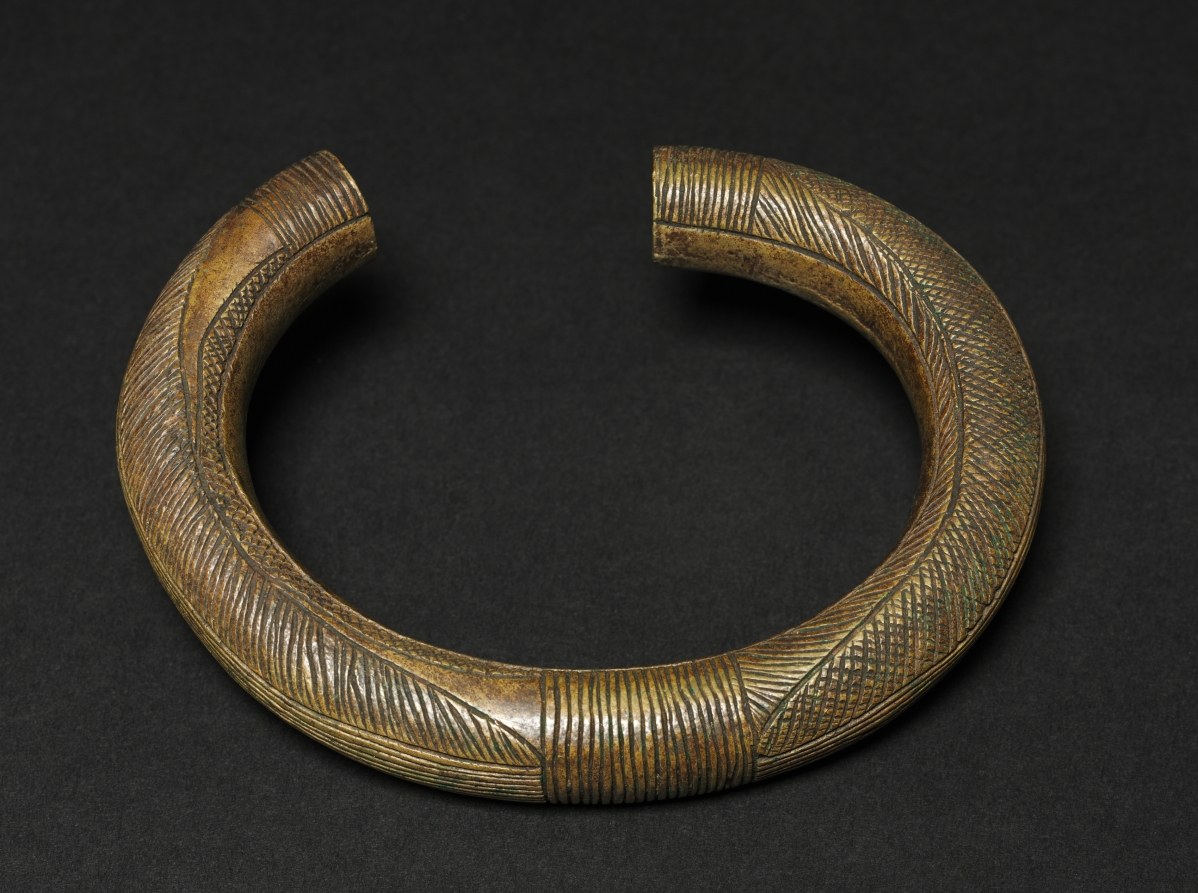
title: Bracelet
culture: Africa, Central Africa, Gabon, Fang-style maker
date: 1900s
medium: Copper alloy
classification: Jewelry